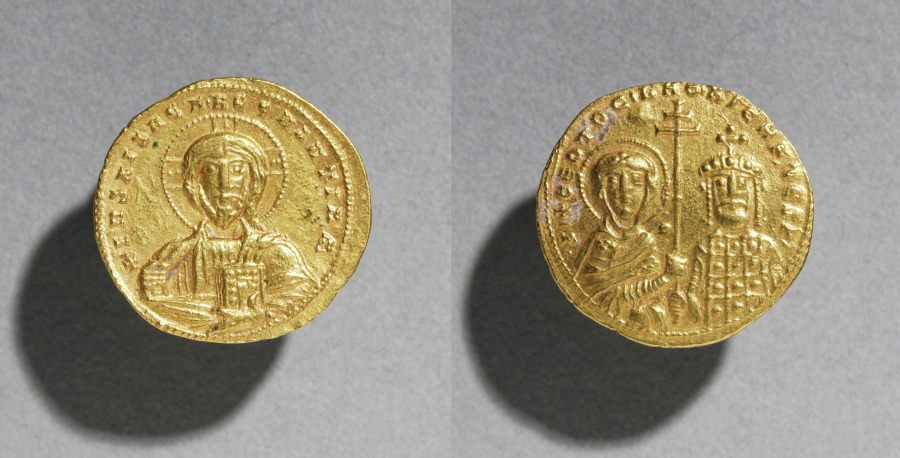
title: Nomisma with Nicephorus II Phocas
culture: Byzantium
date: c. 963–969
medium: gold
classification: Coins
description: Byzantine Gold Coins The vast number of surviving Byzantine coins attests to the level of trade across the empire. Controlled and supervised by the emperor, the producers of coins took care to represent his authority and reflect his stature. Talented artists were recruited to engrave the dies (molds) used for the striking of coins. Emperors increasingly came to include their heirs and co-emperors on their coinage, as well as other family members or even earlier rulers. Coins were recognized, then as now, as small, portable works of art. With their inscriptions and images, Byzantine coins provide valuable documentation of historical events and a record of the physical appearance of the emperors. The coins shown here include the solidus, the basic gold coin of 24 karats; the tremissis, a gold coin of one-third the weight and value of the solidus; and the nomisma, which in the 10th century replaced the solidus as the standard gold coin.